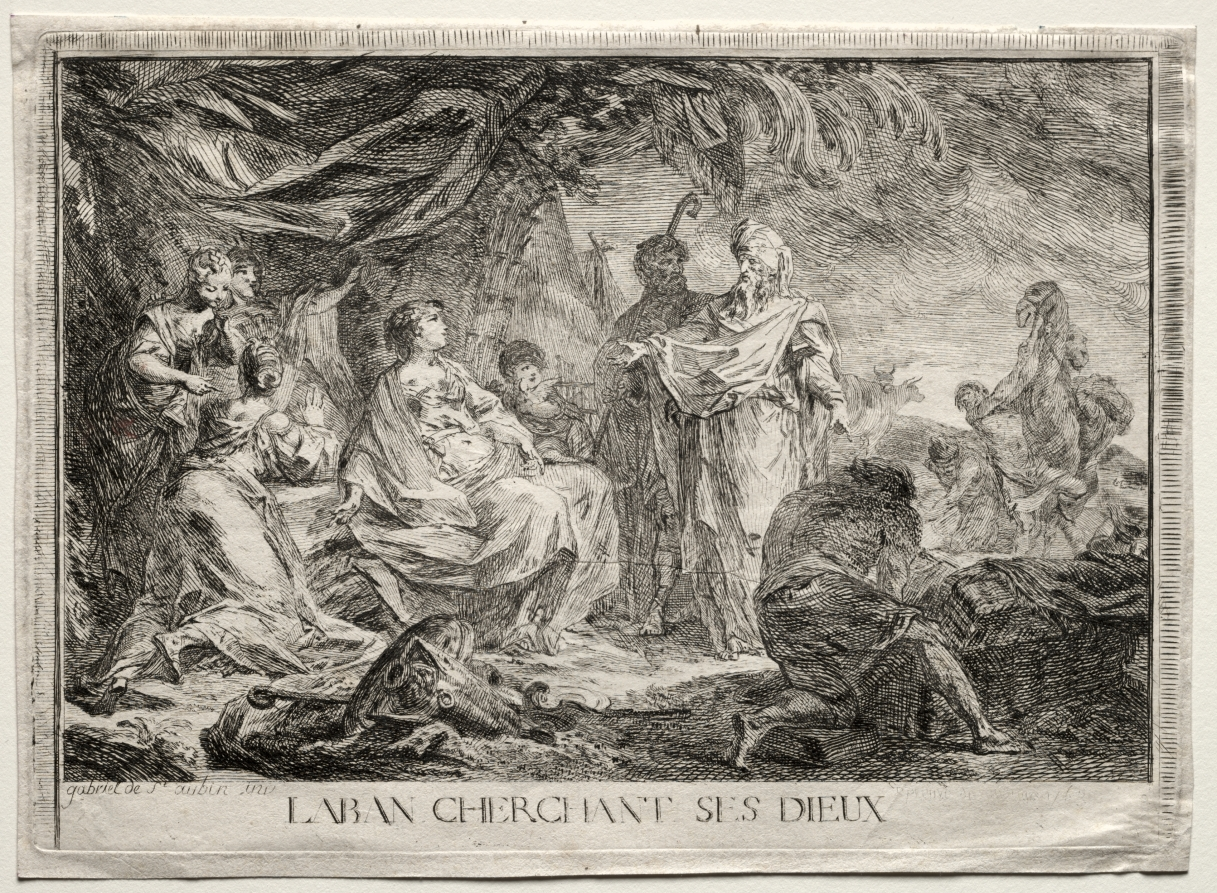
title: Laban Searching for His Household Gods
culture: France, 18th century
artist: Augustin de Saint-Aubin (French, 1736–1807)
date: 1763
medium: etching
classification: Print